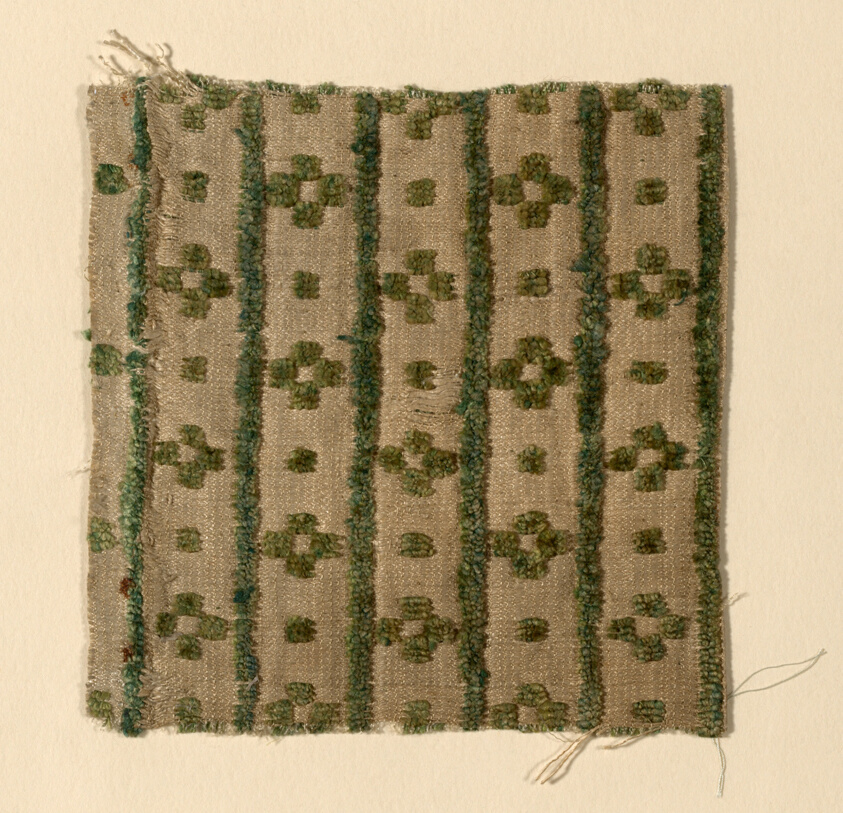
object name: Textile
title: Fragment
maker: France or Italy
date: 1750/1800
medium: Silk and linen, twill weave with supplementary pile warps forming cut and uncut voided velvet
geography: Italy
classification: textile; weaving - velvet